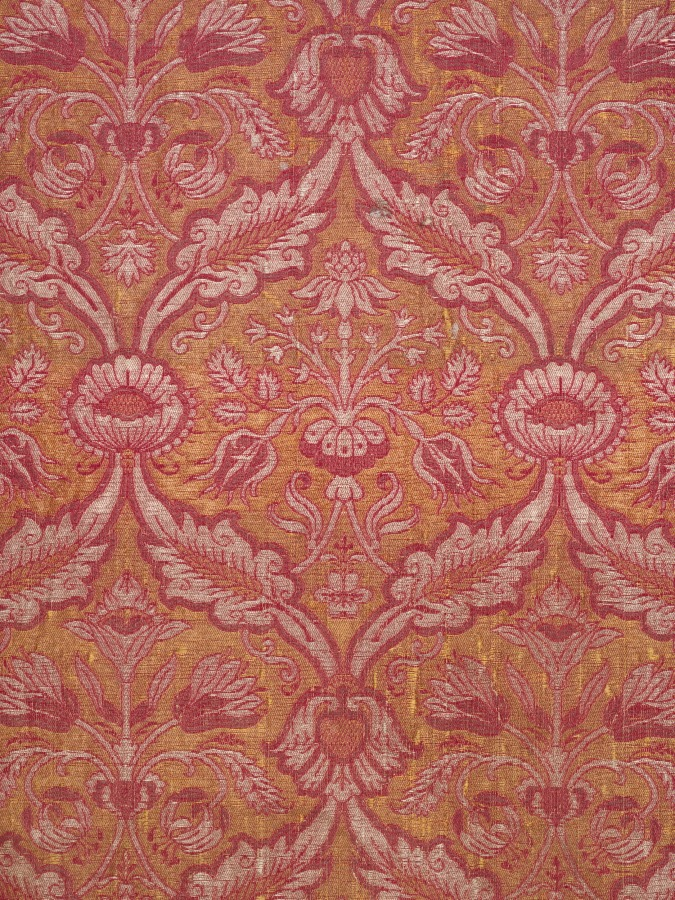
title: Textile with Flora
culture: Italy or Spain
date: c. 1500s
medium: silk, linen, silver thread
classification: Textile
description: This luxurious furnishing fabric might have been a wall covering or part of a long robe. The pattern of floral bouquets framed by curved leaves was popular in Italy, Spain, and Turkey during the 16th century. Darkened by oxidation, the fine silver weft, or horizontal, threads would have once shone brightly and glittered in the flickering candlelight that illuminated rooms before electricity. The preserved selvage edges reveal the width of the original loom; the edge’s color and style may even indicate the quality of the silk thread and the identity of the guild that wove it.